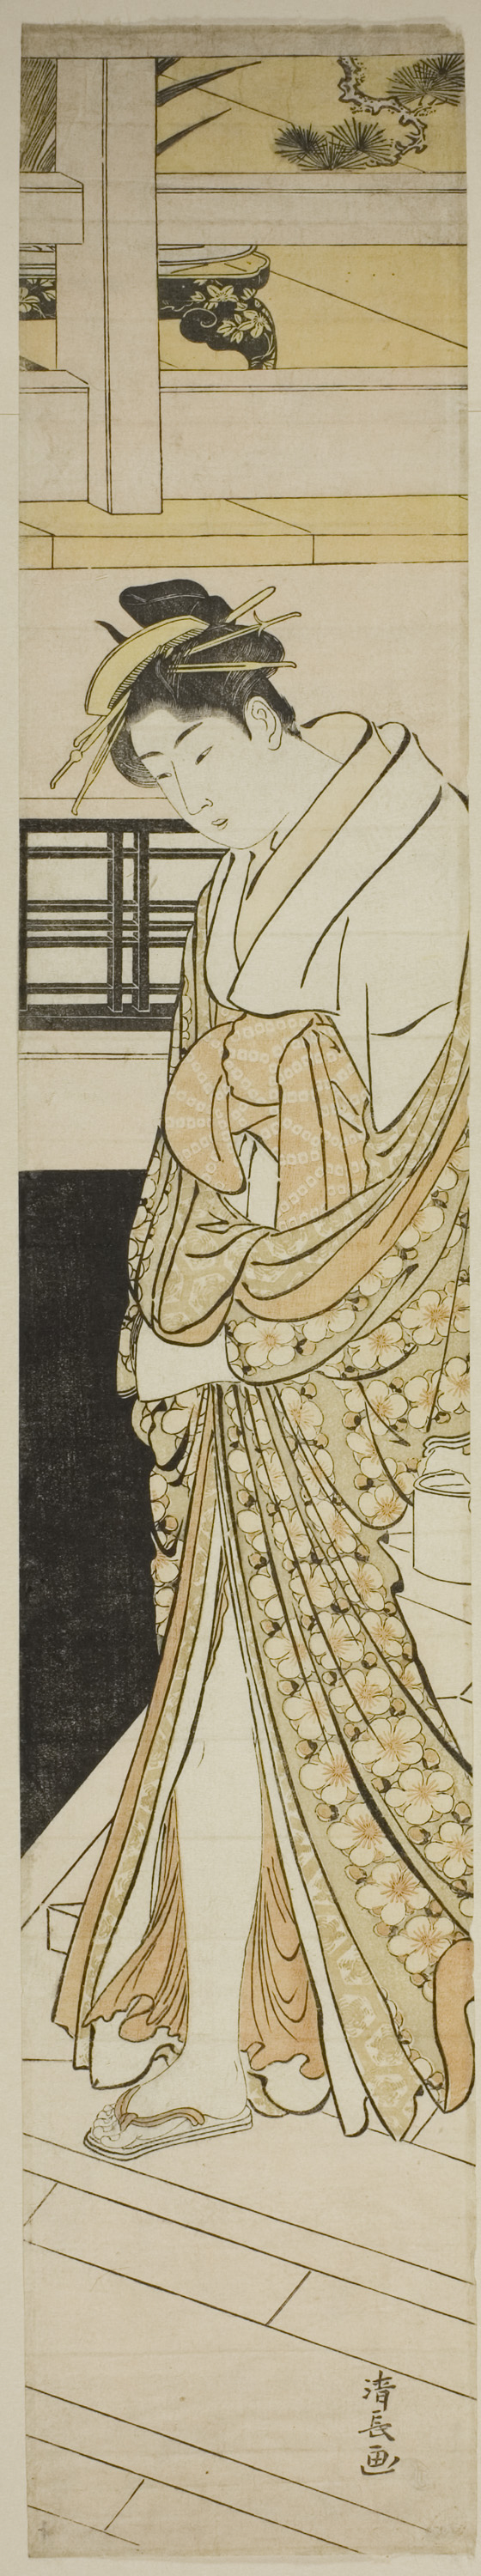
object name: Print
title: Courtesan Descending Stairs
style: Japanese (culture or style)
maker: Torii Kiyonaga (Japanese, 1752-1815)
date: c. 1783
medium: Color woodblock print; hashira-e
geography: Japan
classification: woodblock print; print; asian art